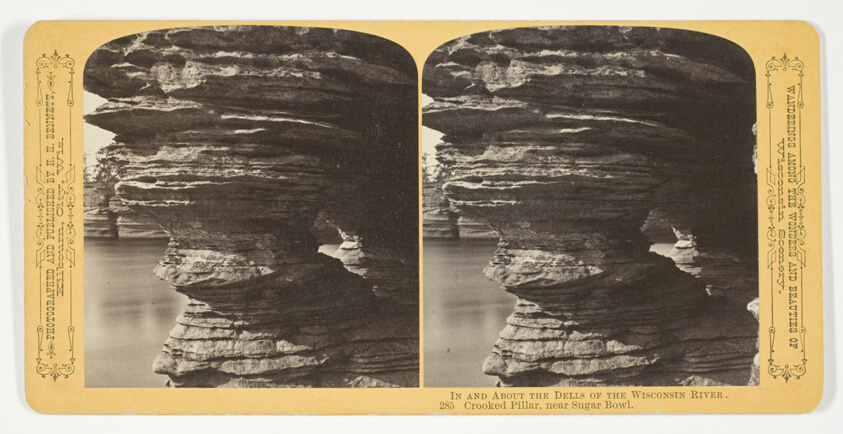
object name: Photograph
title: Crooked Pillar, near Sugar Bowl, No. 285 from the series "In and About the Dells of the Wisconsin River"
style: 19th century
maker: Henry Hamilton Bennett (American, born Canada, 1843-1908)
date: 1870/1908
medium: Albumen print, stereo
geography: Wisconsin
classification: photography; photograph; albumen silver print; stereograph (albumen)